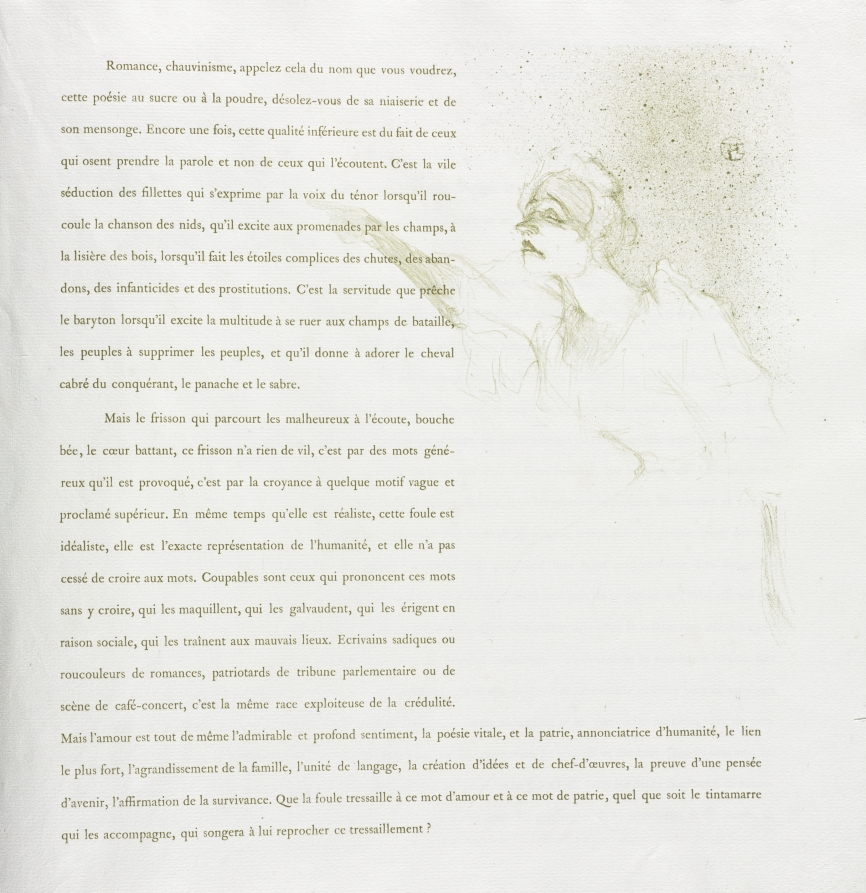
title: Yvette Guilbert-French Series: No. 12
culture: France, 19th century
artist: Henri de Toulouse-Lautrec (French, 1864–1901)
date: 1894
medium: lithograph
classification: Bound Volume